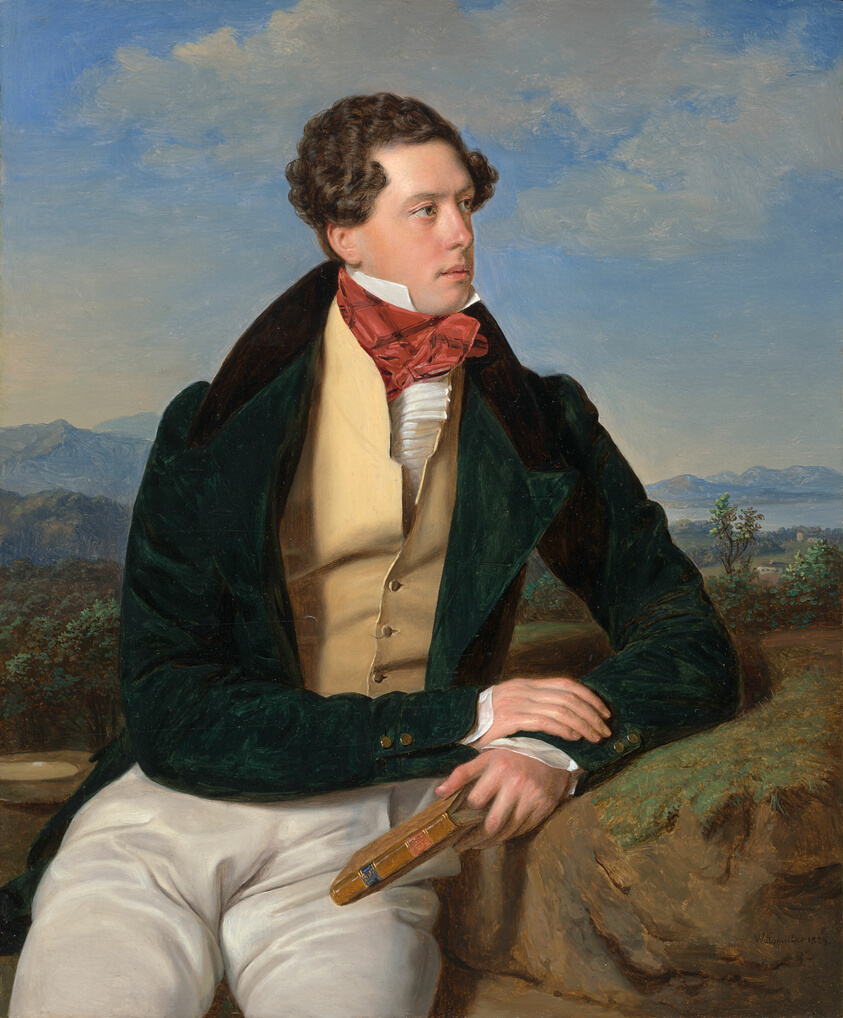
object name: Painting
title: The Actor Maximilian Korn in a Landscape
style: nineteenth century, 19th century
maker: Ferdinand Georg Waldmüller (Austrian, 1793–1865)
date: 1828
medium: Oil on panel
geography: Austria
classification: painting; paint; oil on panel; oil paintings (visual works); european painting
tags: portraits: male subject, water, trees, sun, sky, rocks, portraits, portrait, mountains, mountain, man, light, landscapes, landscape, clouds, bushes, book, actors (performing artists)